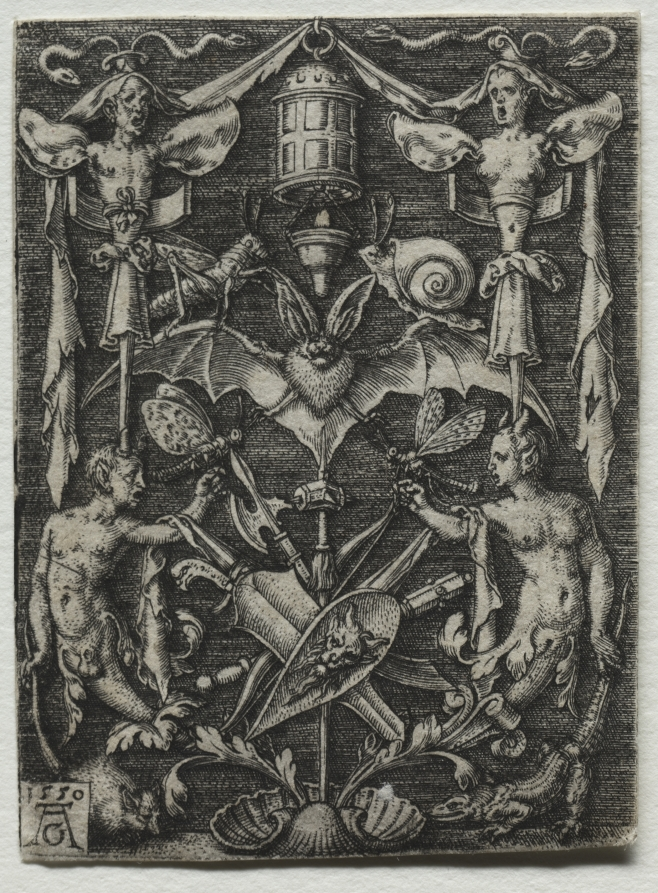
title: Ornament Design with a Bat in the Center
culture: Germany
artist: Heinrich Aldegrever (German, 1502–1555/61)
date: 1550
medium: engraving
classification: Print